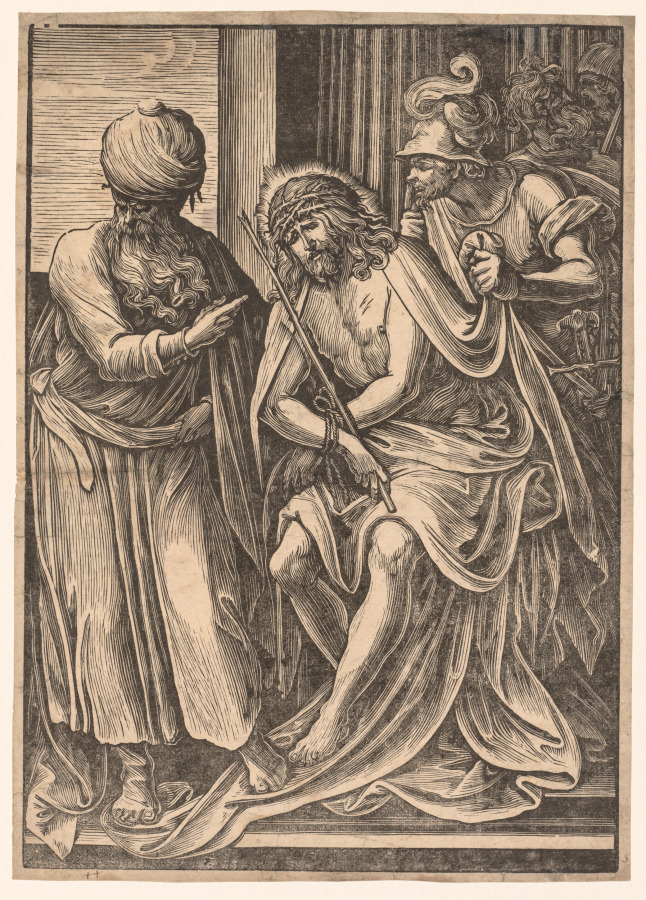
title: Ecce Homo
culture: Italy, late 16th-early 17th century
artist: Giuseppe Scolari (Italian)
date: late 1500s-early 1600s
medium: woodcut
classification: Print